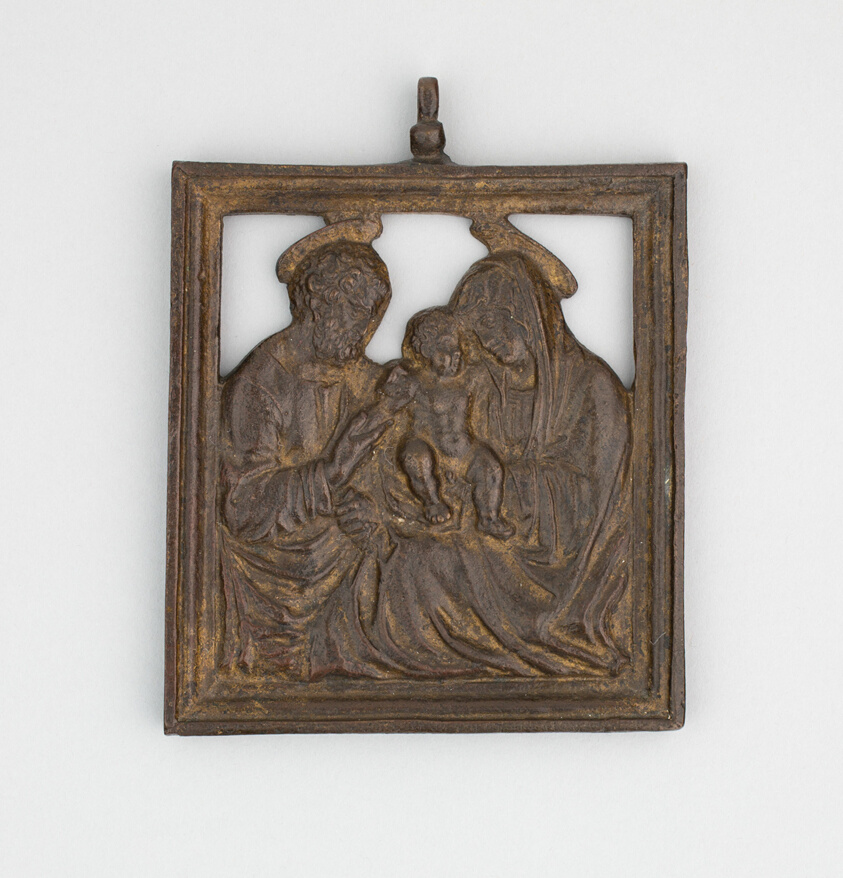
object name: Medals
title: Holy Family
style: 16th Century, sixteenth century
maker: Florentine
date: 1500/1525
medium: Bronze with traces of gilding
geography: Florence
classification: medal/plaquette/coin; sculpture; medal; metal; bronze; Italian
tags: holy family, Christianity, Christian subjects, sons, mother, fathers, babies, boys, family, religious scenes, religious figures, Madonna, Virgin Mary, Jesus, Virgin and child/Madonna and child